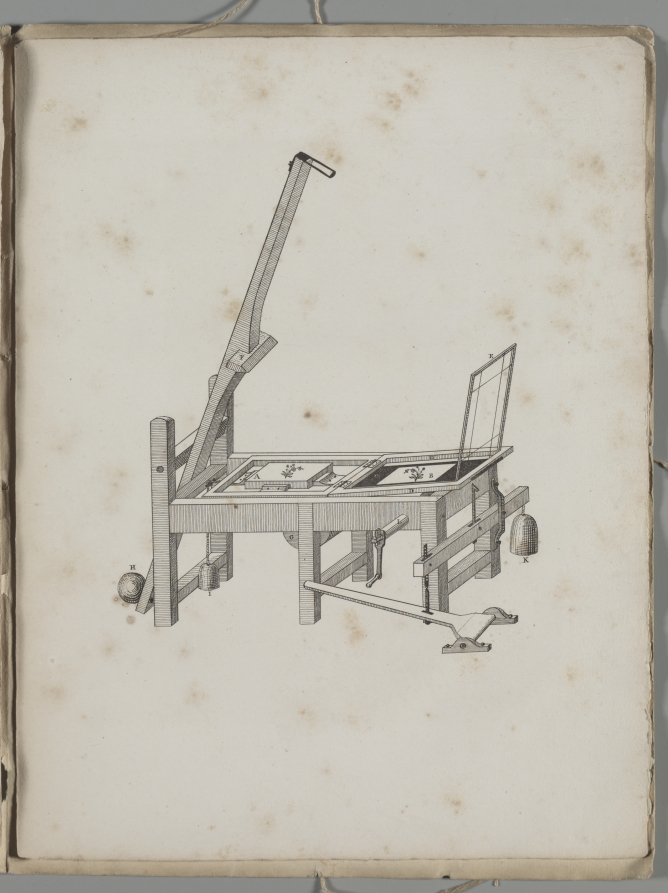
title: Art of the Lithograph: Printing Press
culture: Germany, 19th century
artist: Alois Senefelder (German, 1771–1834)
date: 1819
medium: lithograph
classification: Portfolio